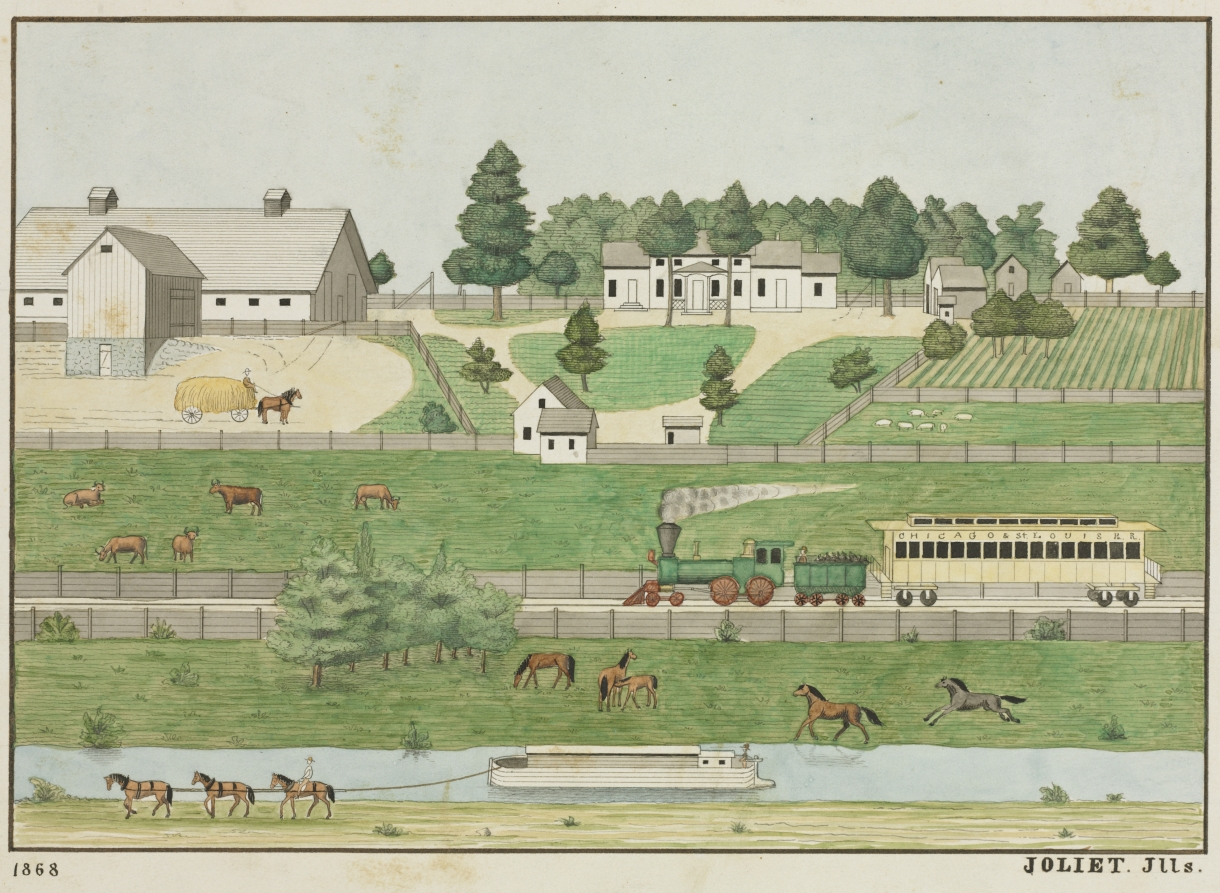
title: Landscape, Joliet, Illinois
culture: America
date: 1868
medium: pen and ink with wash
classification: Drawing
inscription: Printed in ink, below left corner of bottom edge: "1868"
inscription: printed in ink, below right corner of bottom edge: "JOLIET"